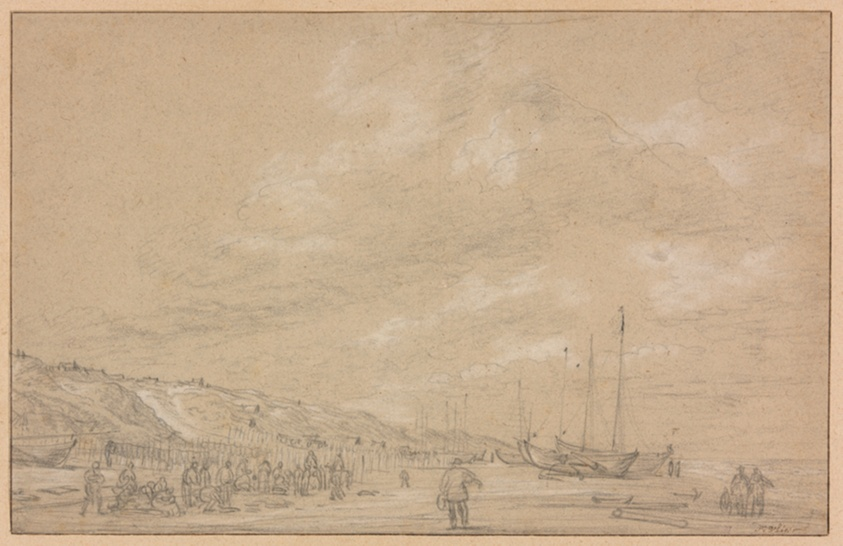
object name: Drawing and Watercolor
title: Fishermen Drying Nets on Scheveningen Beach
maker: Simon de Vlieger (Dutch, c. 1600/01-1653)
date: early 1630s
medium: Black and white chalk on tan laid paper, laid down on tan wove paper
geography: Holland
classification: chalk; drawings (visual works); prints and drawing